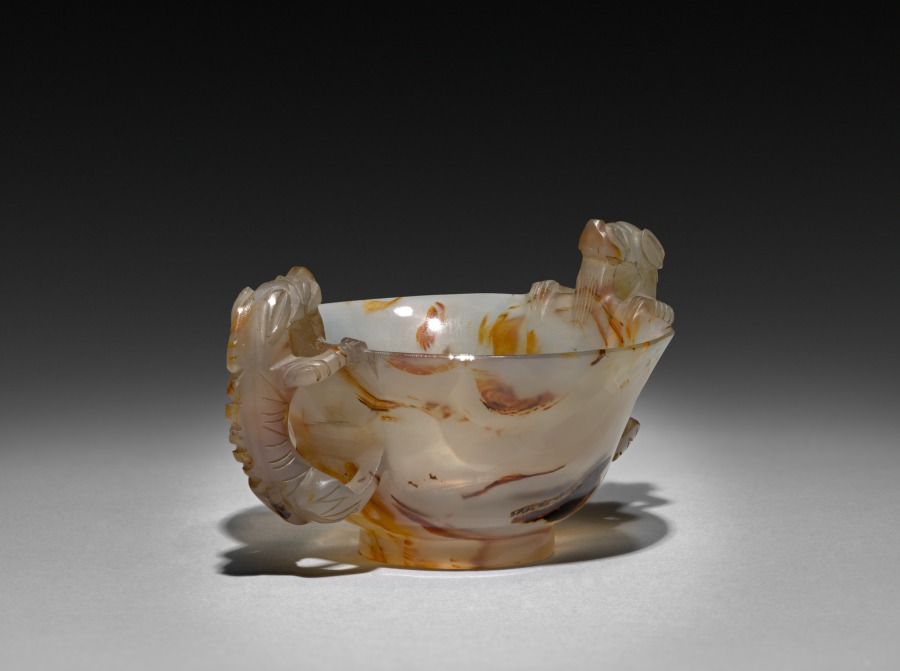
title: Libation Cup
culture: China, Qing dynasty (1644-1911)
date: 1644–1911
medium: agate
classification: Stone